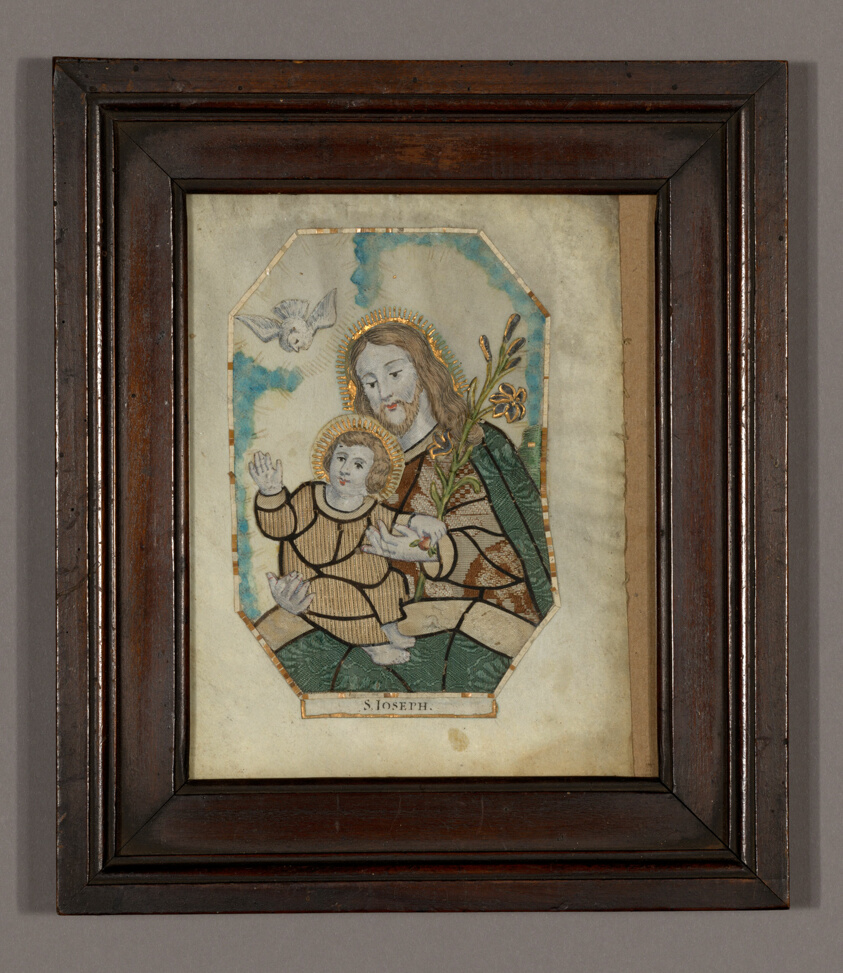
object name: Textile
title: St. Joseph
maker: Germany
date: 19th century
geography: Germany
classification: textile; weaving - printed